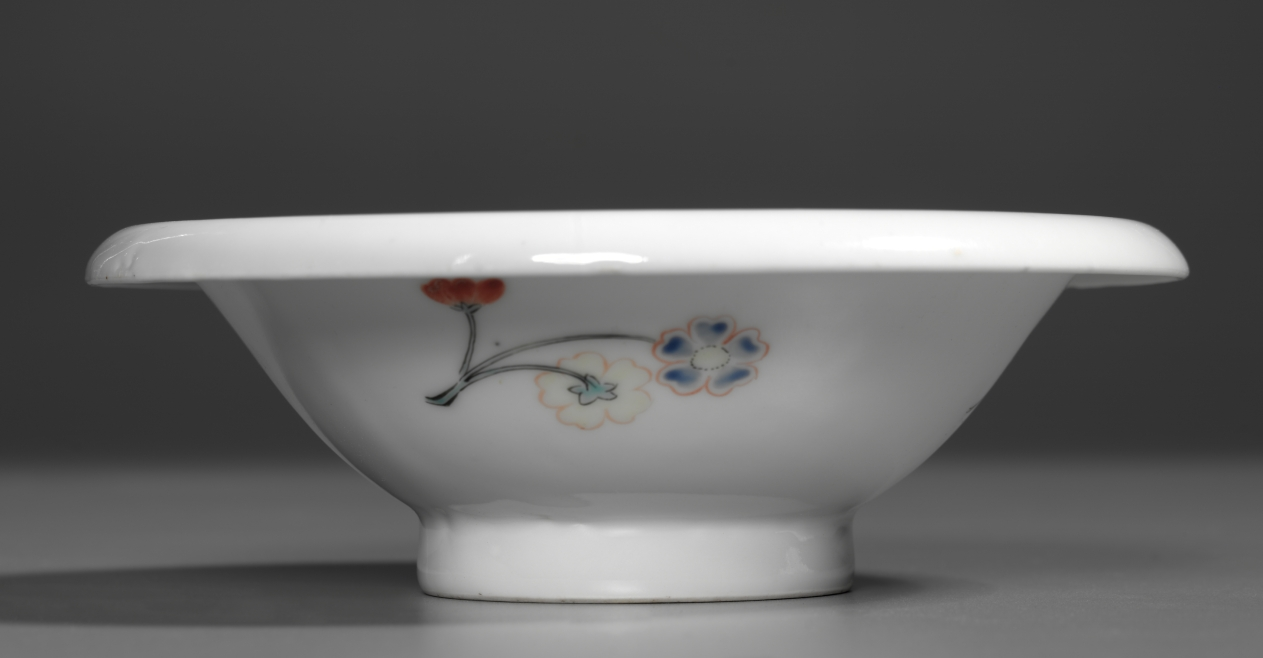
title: Bowl with Floral Spray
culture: Japan, Edo period (1615–1868)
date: early 1700s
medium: porcelain with overglaze color enamel (Hizen ware, Kakiemon type)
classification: Ceramic